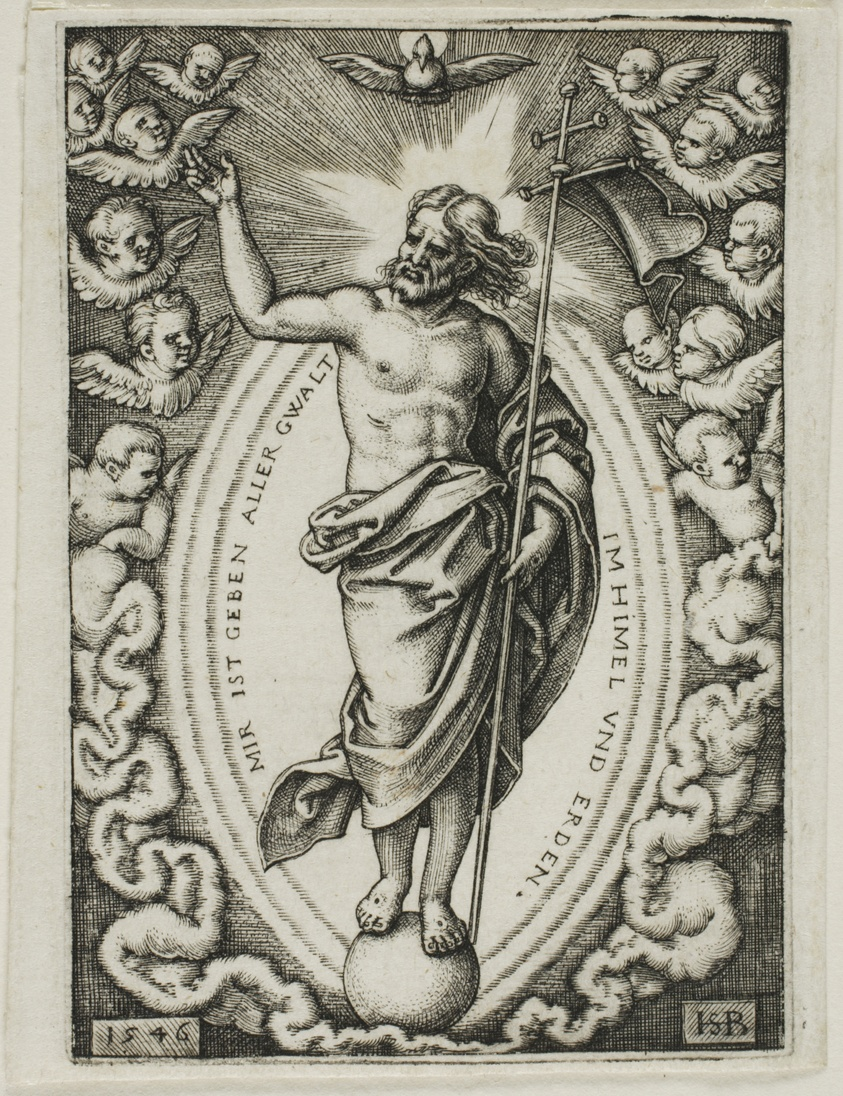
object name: Print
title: Christ on the Globe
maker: Sebald Beham; German, 1500-1550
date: 1546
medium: Engraving in black on ivory laid paper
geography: Germany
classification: engraving; print; prints and drawing